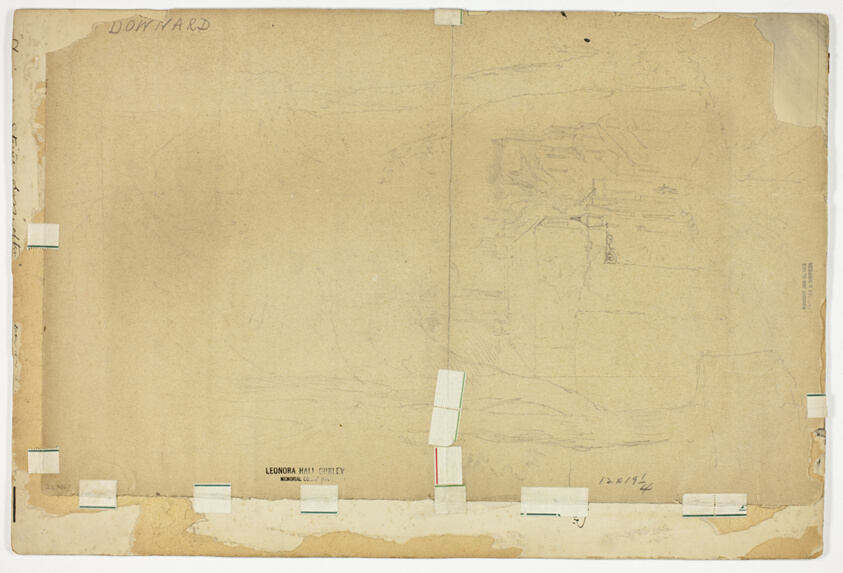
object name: Drawing and Watercolor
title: The Pipe of Peace (recto); Sketch of Village Street (verso)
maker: Ebeneezer Newman Downard; English, 1829-1894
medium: Pen and black ink, over graphite (recto), and graphite (verso) on tan wove paper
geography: England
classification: pen and ink drawings; paper; drawings (visual works); prints and drawing